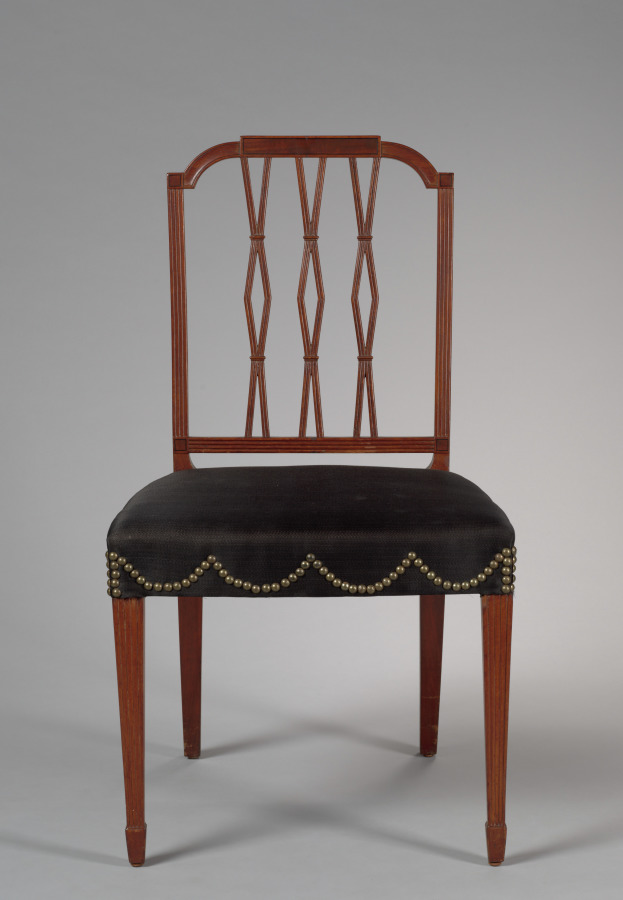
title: Side Chair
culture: America, Massachusetts, Boston, late 18th Century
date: c. 1790–1800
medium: mahogany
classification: Furniture and woodwork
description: Chairs of this or similar design seem to have been made by several Boston cabinetmakers. This chair may have belonged to one or more members of the distinguished Derby family or West family-or both-of nearby Salem, Massachusetts.